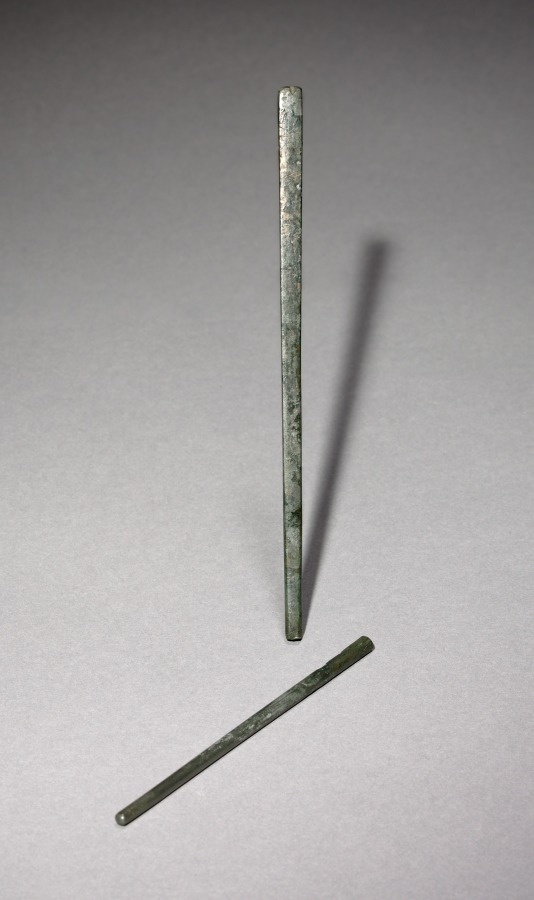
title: Chopstick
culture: Korea, Goryeo dynasty (918–1392)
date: 918–1392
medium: bronze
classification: Metalwork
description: In Korea, chopsticks made of metal such as brass, silver, and gold were excavated from ancient tombs and ruins dated to the 6th century at the earliest. Burial goods often include utilitarian objects such as table wares and utensils because the dead were believed to need them in the afterlife.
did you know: In contrast to the Chinese and Japanese, Koreans still prefer metal chopsticks (stainless steel and brass) to wooden ones.